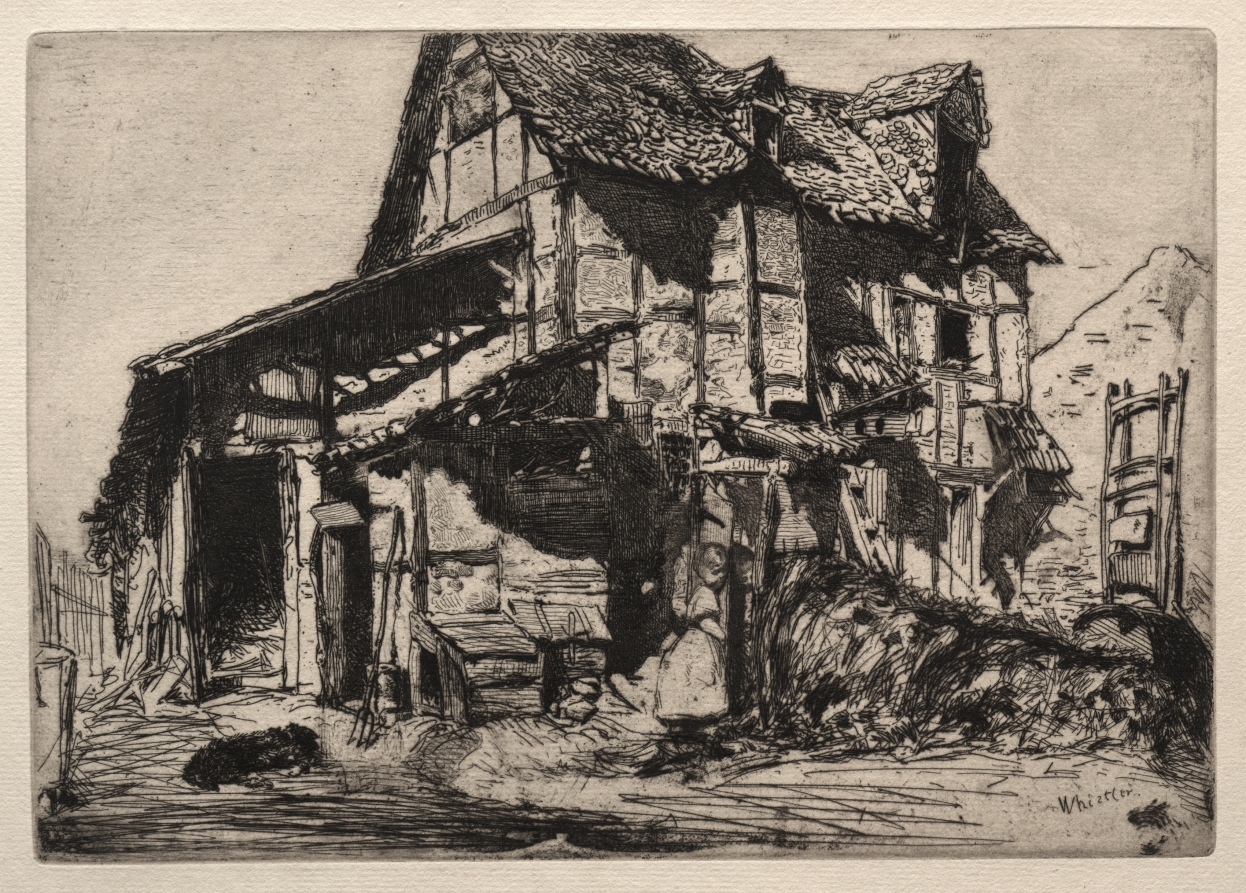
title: An Unsafe Tenement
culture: America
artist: James McNeill Whistler (American, 1834–1903)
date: 1858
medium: etching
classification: Print